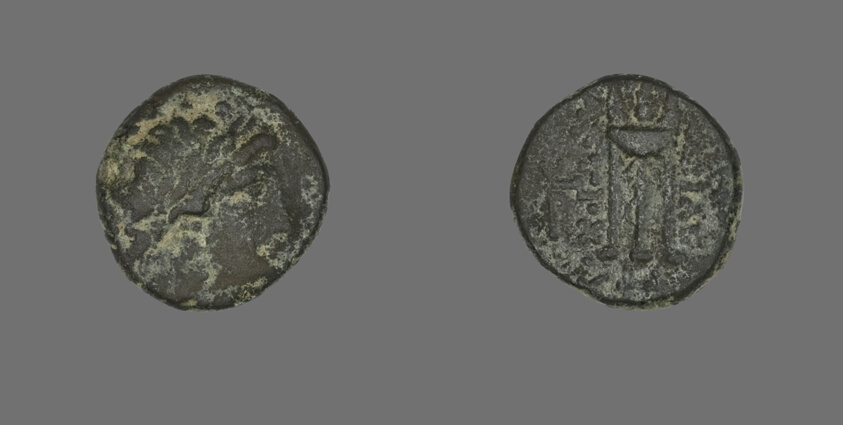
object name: Coin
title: Coin Depicting the God Apollo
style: greek, ancient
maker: Greek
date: 261-246 BCE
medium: Bronze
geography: Ancient Greece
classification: coin; ancient art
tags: gods (deities)